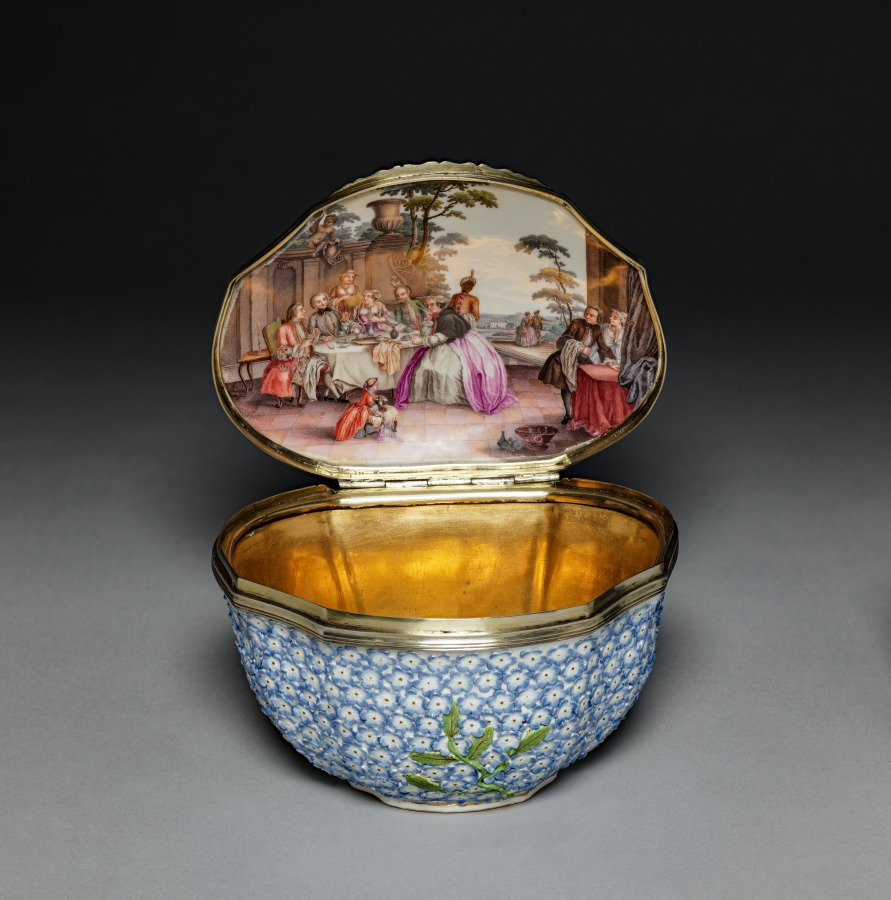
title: Covered Box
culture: Germany, Meissen, 18th century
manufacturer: Meissen Porcelain Factory (German, est. c. 1710)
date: c. 1750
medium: porcelain mounted in silver with traces of gilding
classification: Ceramic